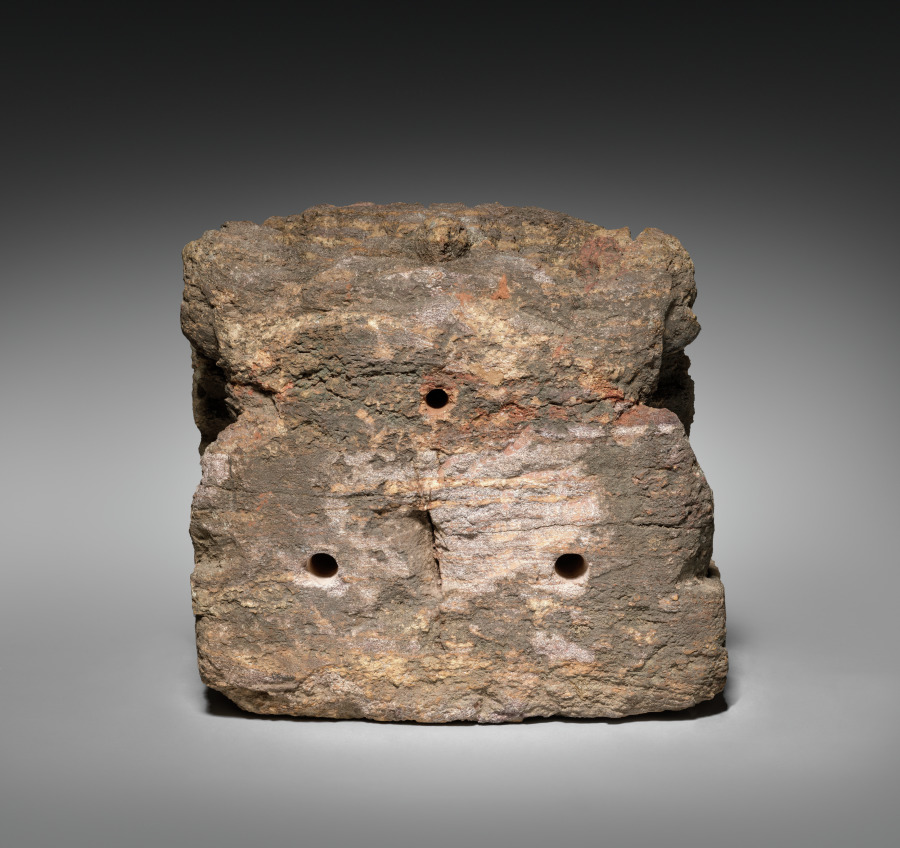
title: Base and Feet of Devata or Yakshi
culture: India, Province of Orissa, 20th century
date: 20th century fake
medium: sandstone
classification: Sculpture